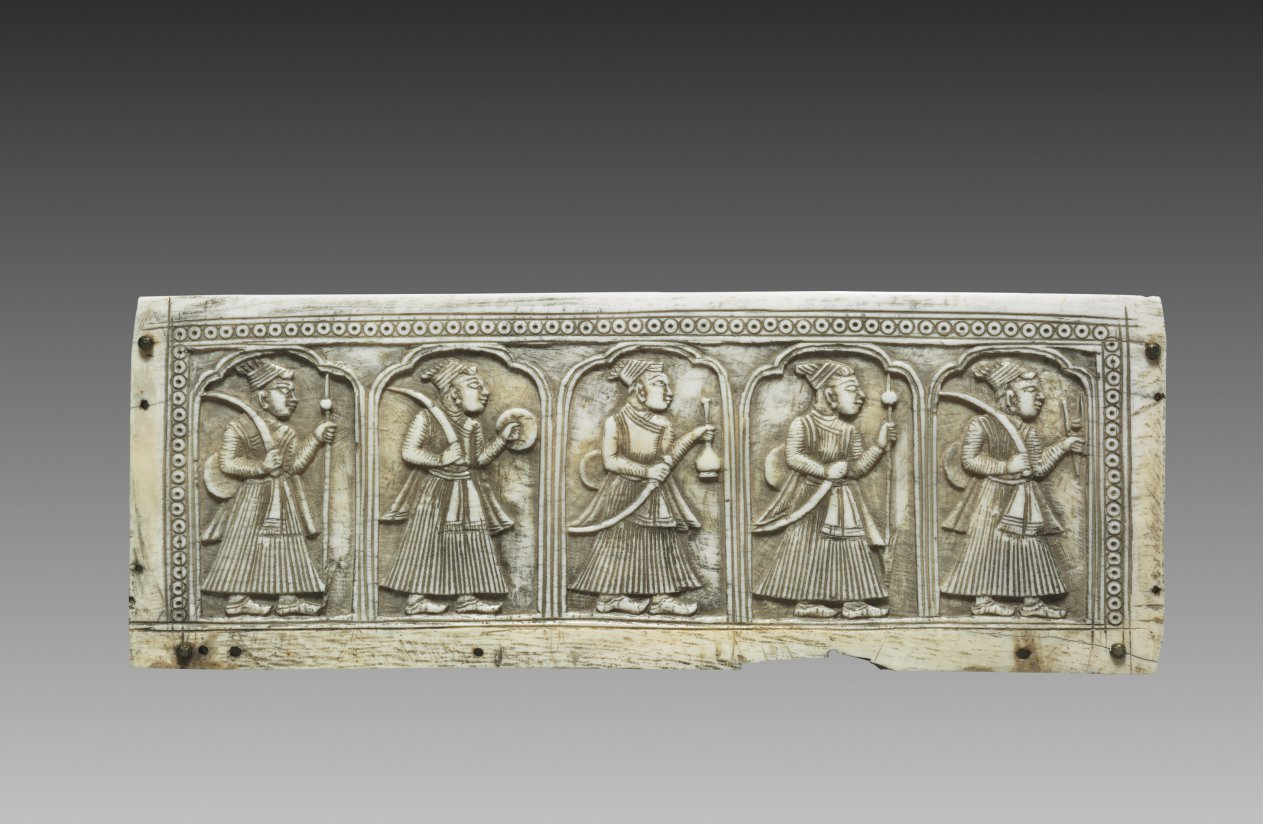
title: Panel from a Box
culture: India, North East Deccan, Visakhapatnam, Mughal Dynasty (1526-1756)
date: c. 1700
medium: ivory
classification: Ivory